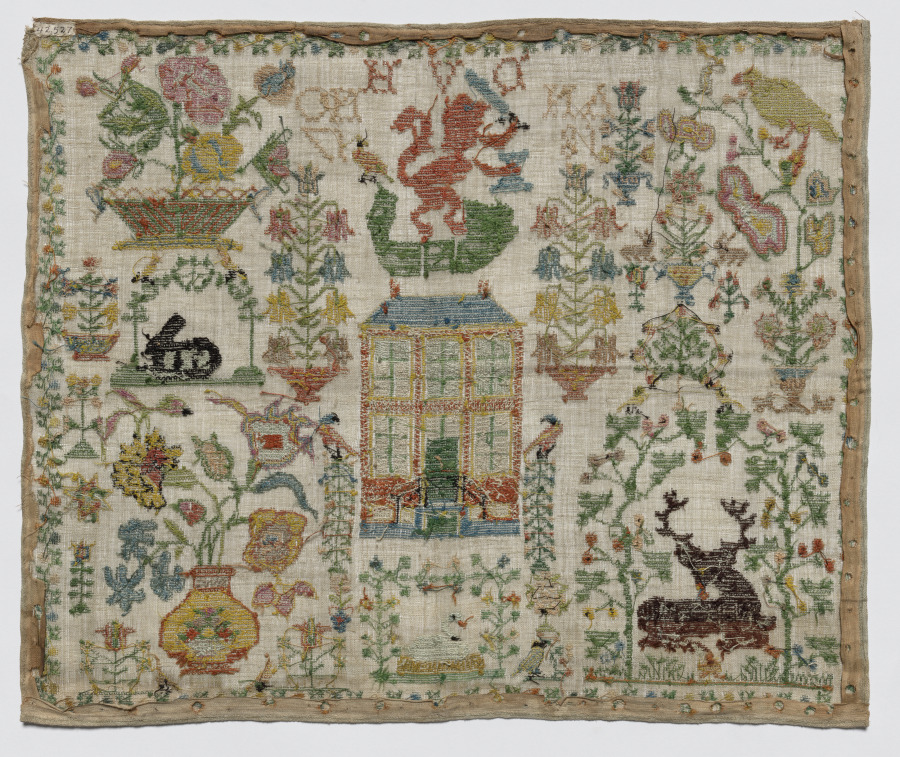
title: Sampler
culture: Netherlands, early 19th century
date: 1817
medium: embroidery; silk on woolen canvas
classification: Sampler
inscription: "D.V.H./ Anno 1817."